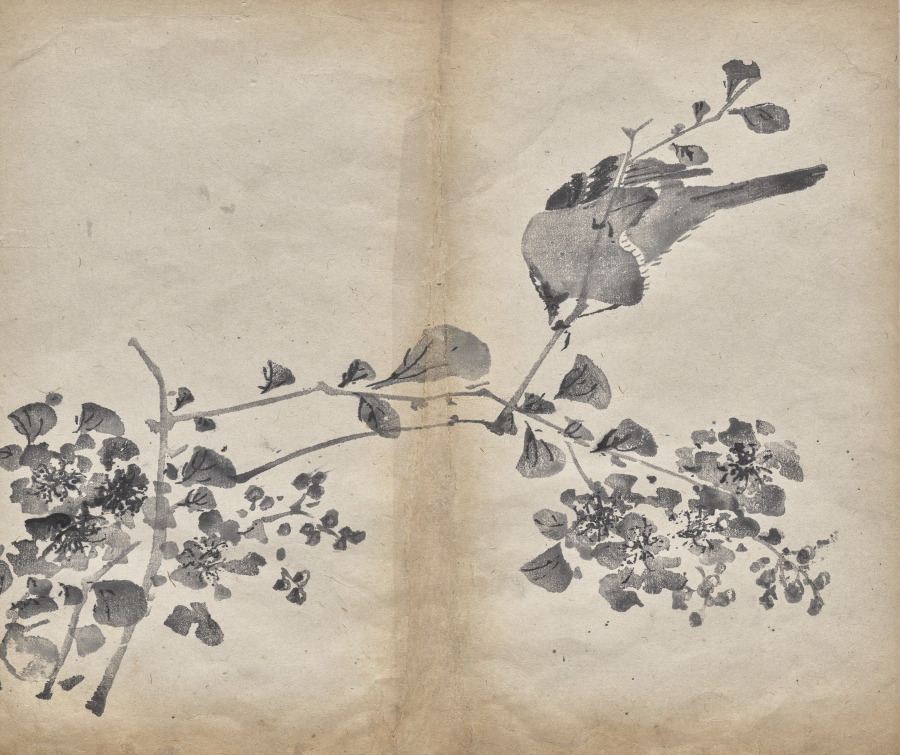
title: Blossoms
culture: China, Ming dynasty (1368–1644)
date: 1625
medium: color woodblock print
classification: Print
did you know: This color woodblock print is from a Ming dynasty artists’ primer called the Ten Bamboo Studio Painting and Calligraphy Handbook 十竹齋書畫譜.